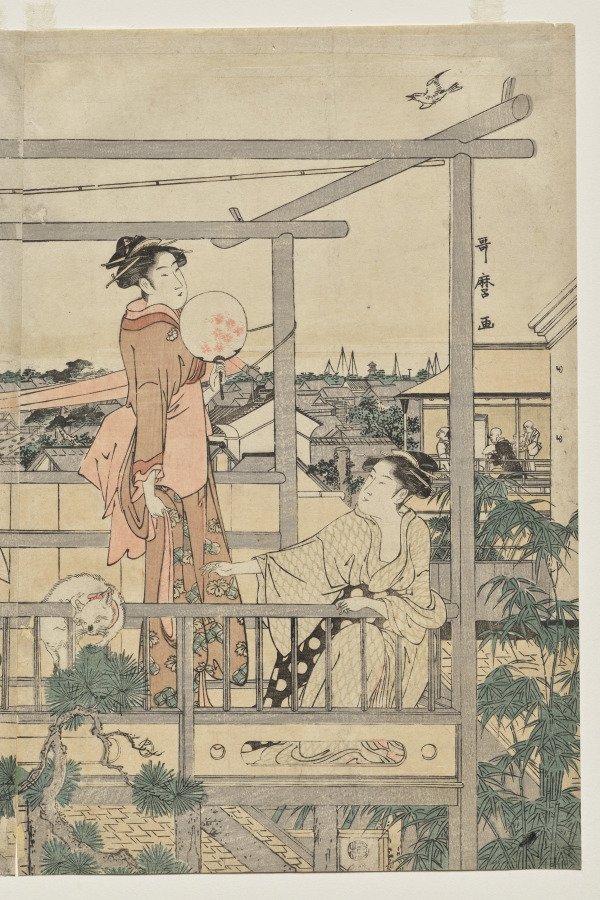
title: Women Hanging Laundry to Dry on a Balcony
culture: Japan, Edo period (1615–1868)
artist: Kitagawa Utamaro (Japanese, c. 1754–1806)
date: early 1790s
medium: color woodblock print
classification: Print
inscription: Artist's signature: Utamaro ga.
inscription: Publisher: Iwatoya Kisaburō (Iwa). Censorship Seal: Kiwame.